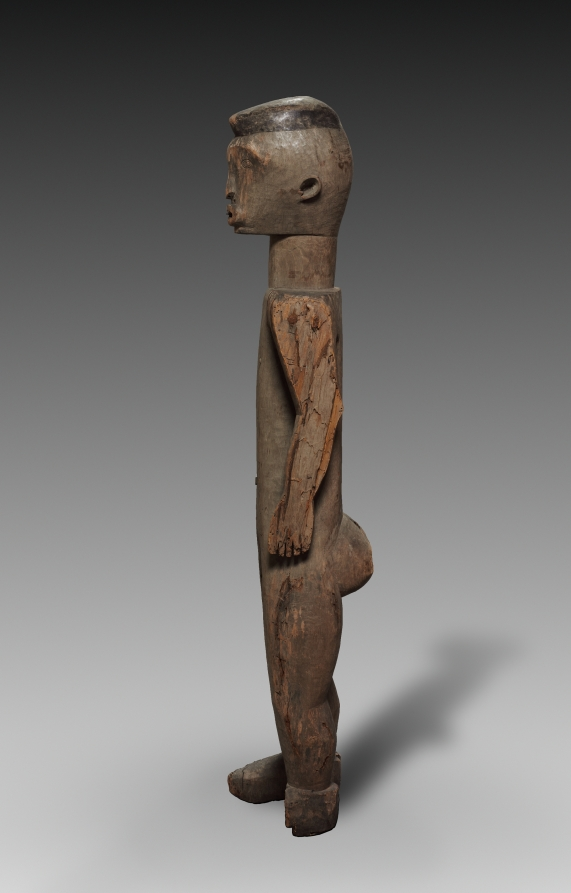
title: Figure of a Pair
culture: Africa, Central Africa, Democratic Republic of the Congo or Central African Republic (most likely), possibly Monzombo-style maker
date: late 1800s–early 1900s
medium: Wood and iron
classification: Sculpture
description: The Ubangi region's history of successive migrations and assimilations has resulted in numerous exchanges of religious beliefs and ritual practices. Despite some stylistic traits, including the heart-shaped faces and the male's crested coiffure, this figure with its female pair is unlike any other in the Ubangian corpus. Based on indirect evidence, the pair is said to represent the culture's primordial couple.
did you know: This pair is of a male and female and is said to represent the culture's primordial couple. There are no other carved mother-child figures that originate from the Monzombo ethnic group.